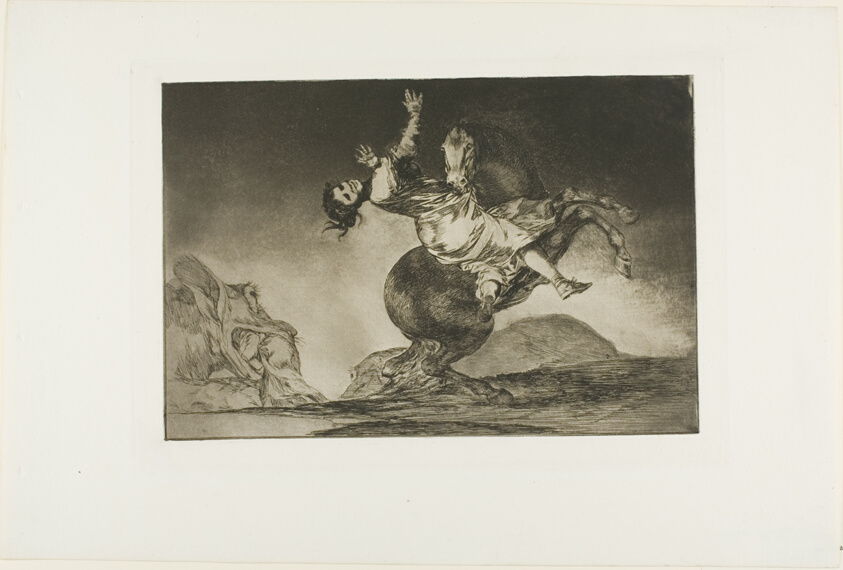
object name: Print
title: A Woman and a Horse, Let Someone Else Master Them, plate ten from Los Proverbios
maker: Francisco José de Goya y Lucientes (Spanish, 1746-1828)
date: 1815/24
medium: Etching with aquatint and drypoint in black on ivory wove paper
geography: Spain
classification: etching; print; prints and drawing